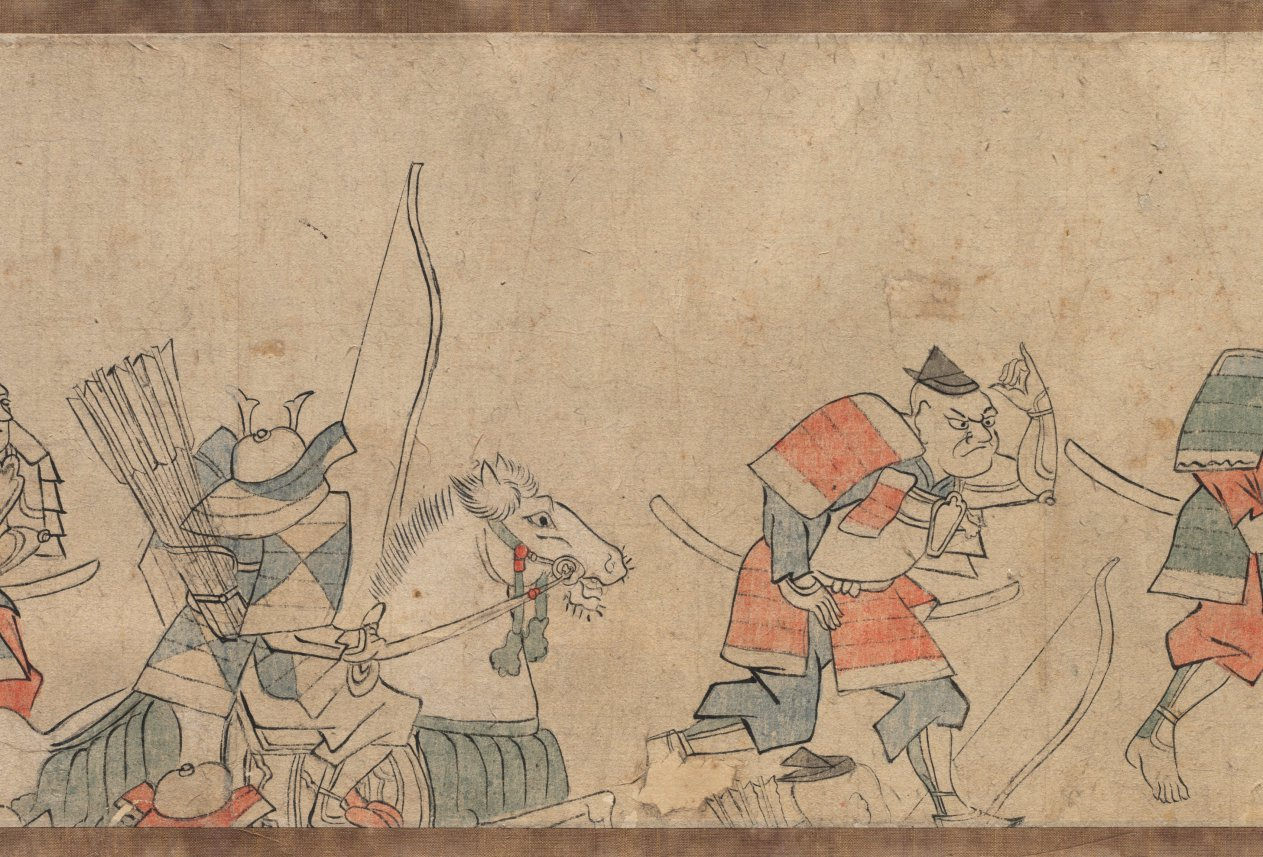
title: Oeyama Engi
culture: Japan, Edo period (1615–1868)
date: 1615–1868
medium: one of a pair of handscrolls; ink and color on paper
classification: Painting